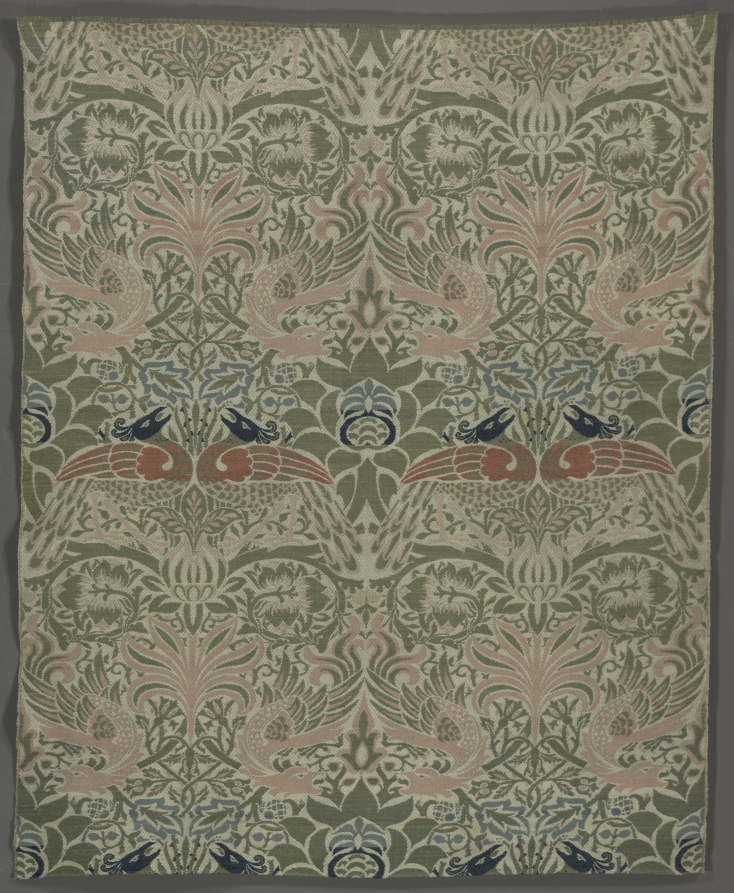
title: Peacock and Dragon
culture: England, Surrey, Merton Abbey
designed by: William Morris (British, 1834–1896)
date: 1878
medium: weft-faced compound twill; wool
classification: Textile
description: Morris sought to produce textiles that could function as he imagined medieval wall hangings had, bringing warmth to stone-cold rooms. Boldly designed with soothing colors in thick wool, Peacock and Dragon is the closest Morris came to achieving this ideal. In the same year he designed this textile, Morris visited the shop of the London dealer Vincent Robinson, where he saw a room re-created from Damascus, “all vermillion and gold and ultramarine, very beautiful, and is just like going into the Arabian nights.” It partly inspired the exotic motifs seen here. This design was one of the most popular among Morris’s customers; it was available in five colorways.